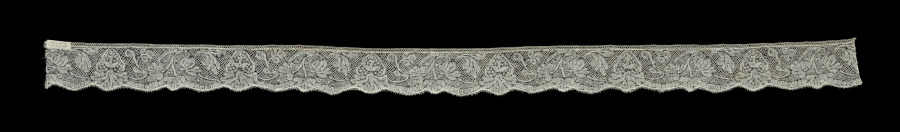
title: Lace Edging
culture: Belgium, Binche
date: 1740–60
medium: Bobbin lace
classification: Lace